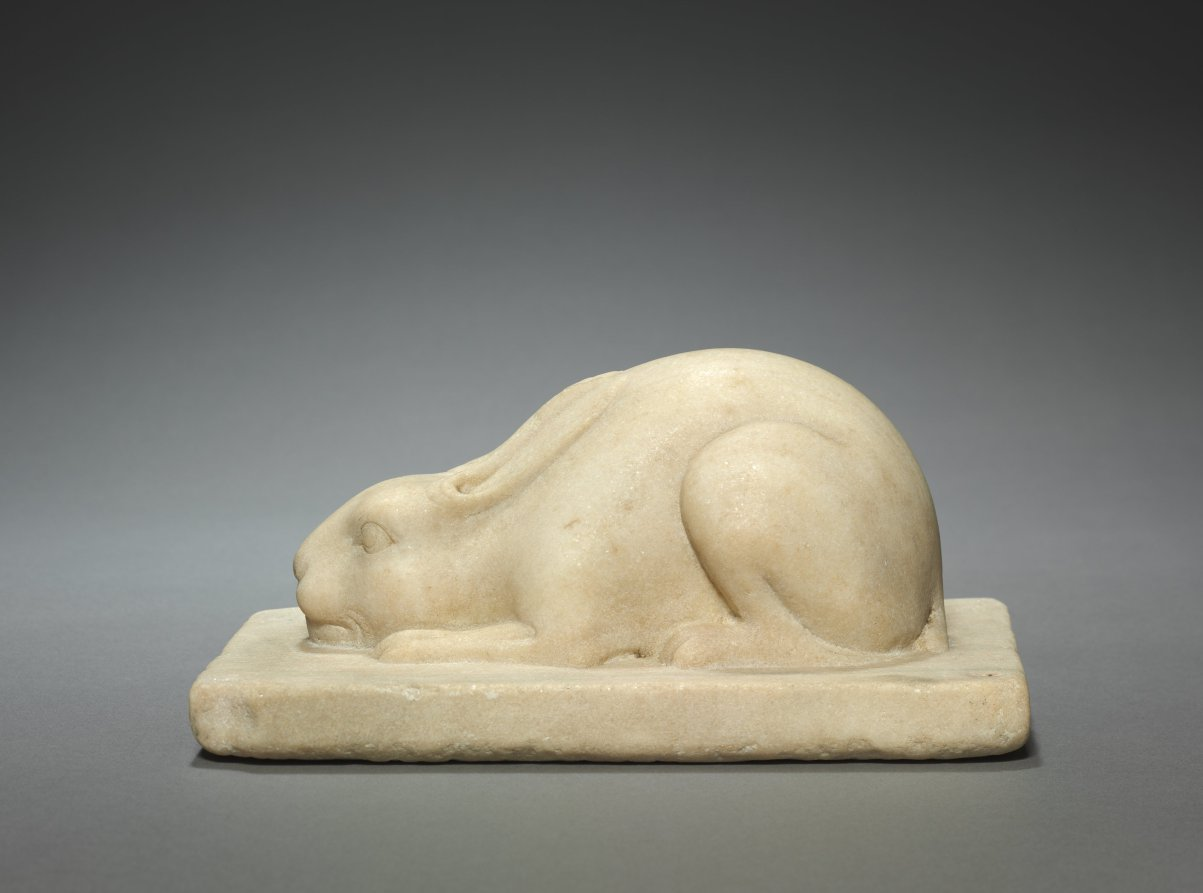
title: Hare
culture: North China, Tang dynasty (618-907)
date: early 700s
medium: white marble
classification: Sculpture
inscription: Incised on brow: 'wang' (in Chinese character)